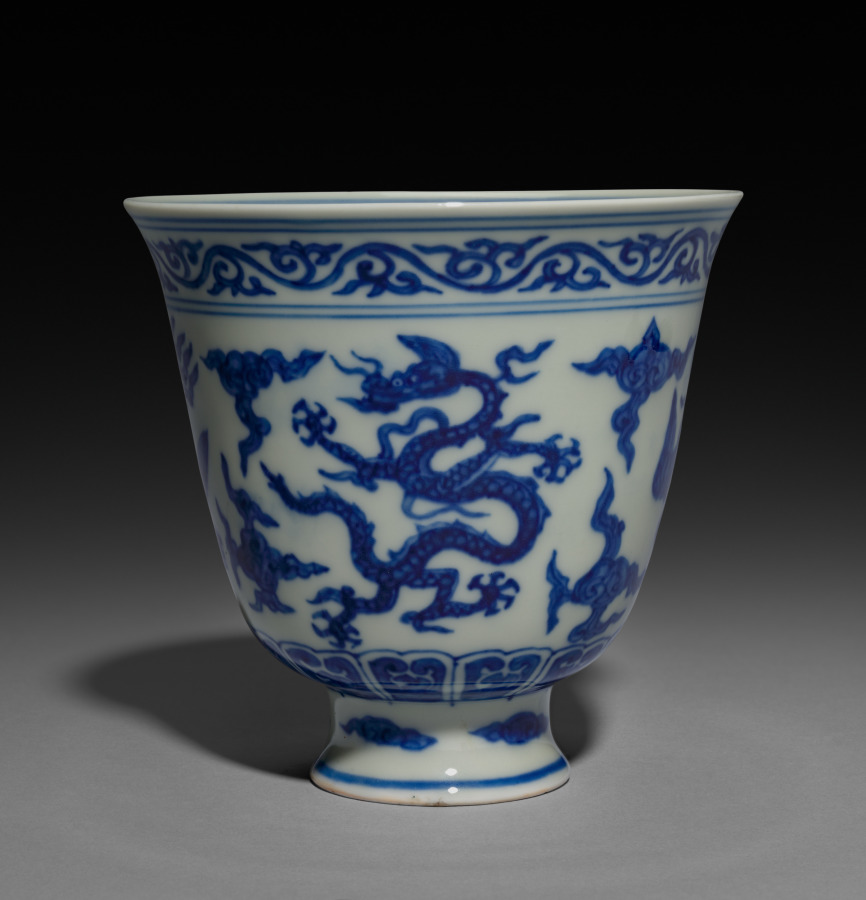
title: Cup with Dragons and Phoenixes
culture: China, Jiangxi province, Jingdezhen kilns, Ming dynasty (1368-1644), Jiajing mark and reign (1522-66)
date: 1522–66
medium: porcelain with underglaze blue decoration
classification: Ceramic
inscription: 大明嘉靖年製